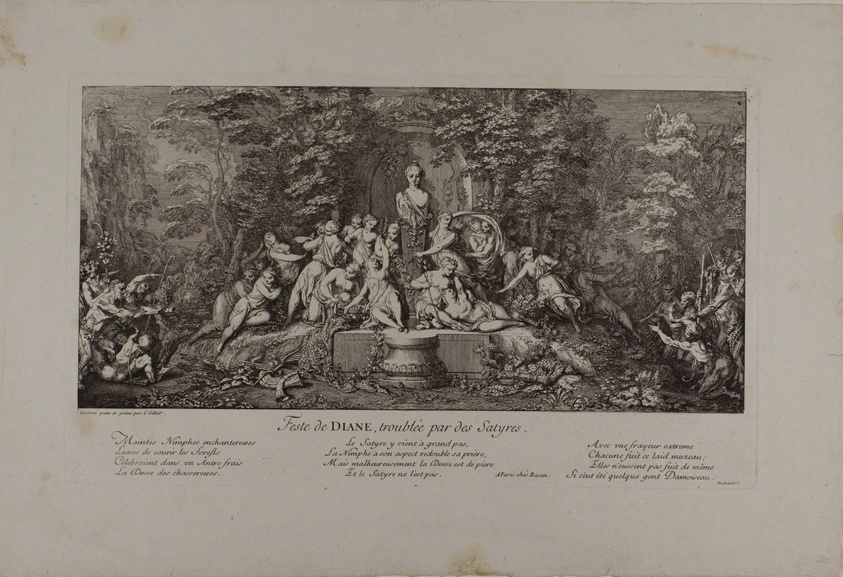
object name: Print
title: Feste de Diane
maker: Claude Gillot (French, 1673-1722)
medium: Etching on paper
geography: France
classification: etching; print; prints and drawing